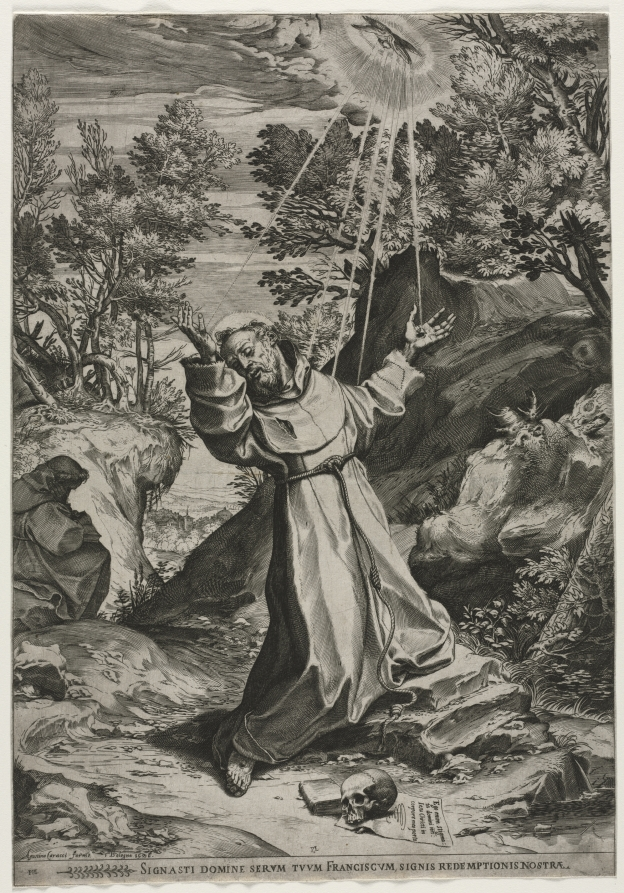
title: St. Francis Receiving the Stigmata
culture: Italy, 16th century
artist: Agostino Carracci (Italian, 1557–1602)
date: 1586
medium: engraving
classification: Print